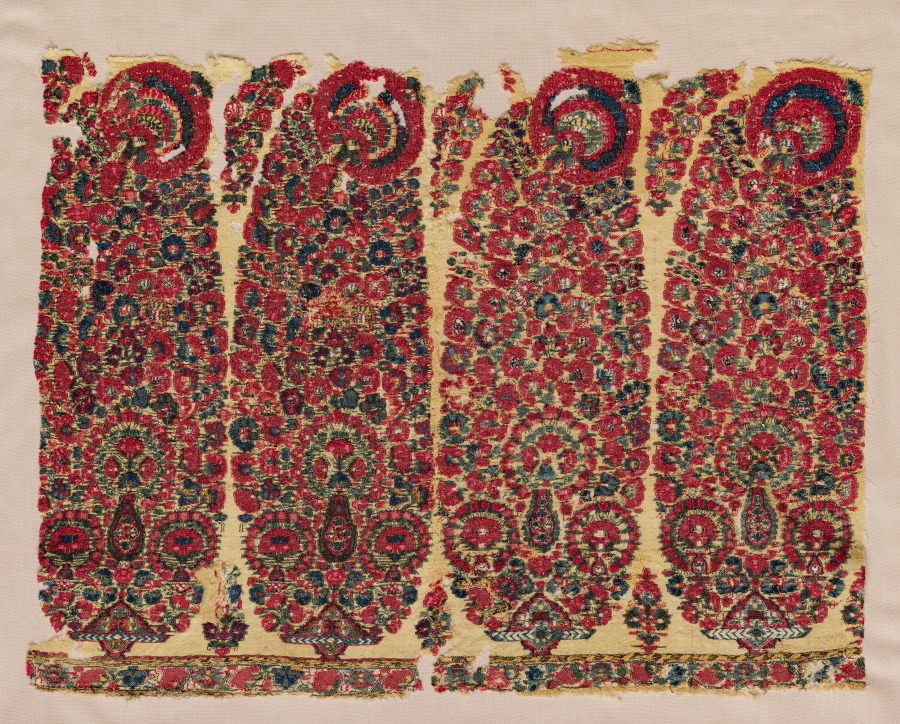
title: Border of a Shawl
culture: India, Kashmir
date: c. 1825–30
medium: wool: tapestry twill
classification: Textile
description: Kashmiri shawls were extremely popular in the early 1800s, especially among foreigners to the Indian subcontinent. Made in the mountainous region of northwest India from wool from mountain goats from nearby Ladakh, the fabrics were especially prized for their softness and their beautiful symmetrical designs, often called paisley in English. This textile fragment was once owned by Ananda Coomaraswamy (1877–1947), a Ceylonese (Sri Lankan) art historian and collector who is credited with introducing South Asian art to museums in the United States.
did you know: The top of the teardrop design recalls fanned-out peacock feathers.